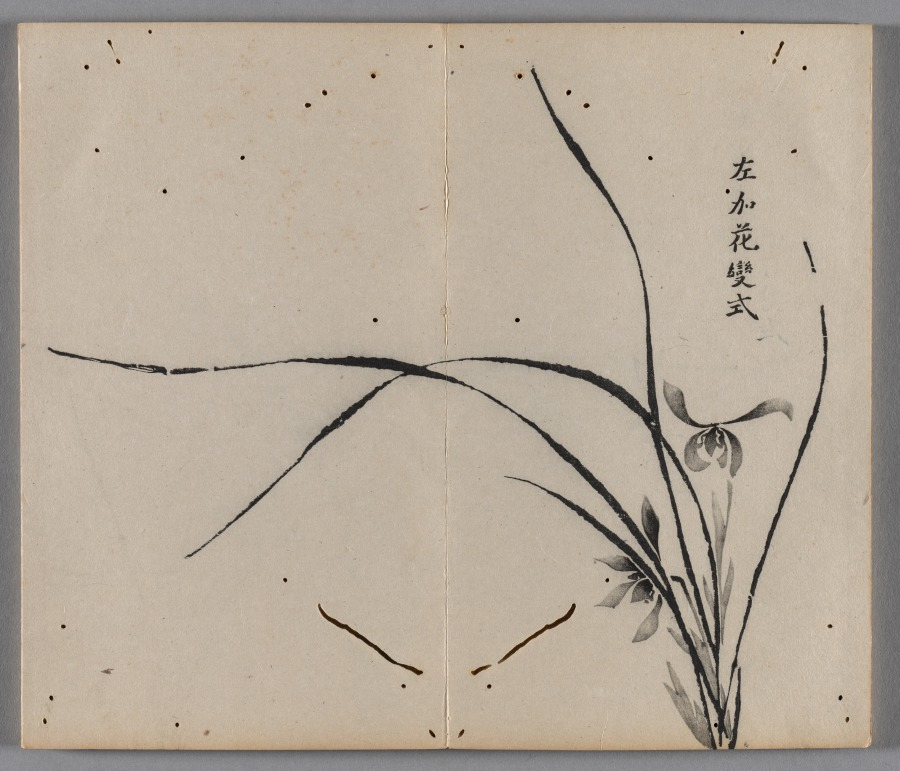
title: Ten Bamboo Studio Painting and Calligraphy Handbook (Shizhuzhai shuhua pu): Orchids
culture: China, Qing dynasty (1644-1911)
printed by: Hu Zhengyan (Chinese, c. 1584–1674)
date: 1633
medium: Woodblock-printed book; ink and colors on paper; first edition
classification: Print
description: Color printing reached a level of perfection in the early 1600s, as seen in this Ten Bamboo Studio Collection of Calligraphy and Painting and the Mustard Seed Garden Manual of Painting (printed 1679 and 1701). The painterly quality, precision in registering (aligning) the woodblocks, and harmonious colors made them the most successful color print editions in Chinese history. Both editions were printed and compiled in Nanjing, spread nationwide, and had a great impact on the arts in Japan and Korea.